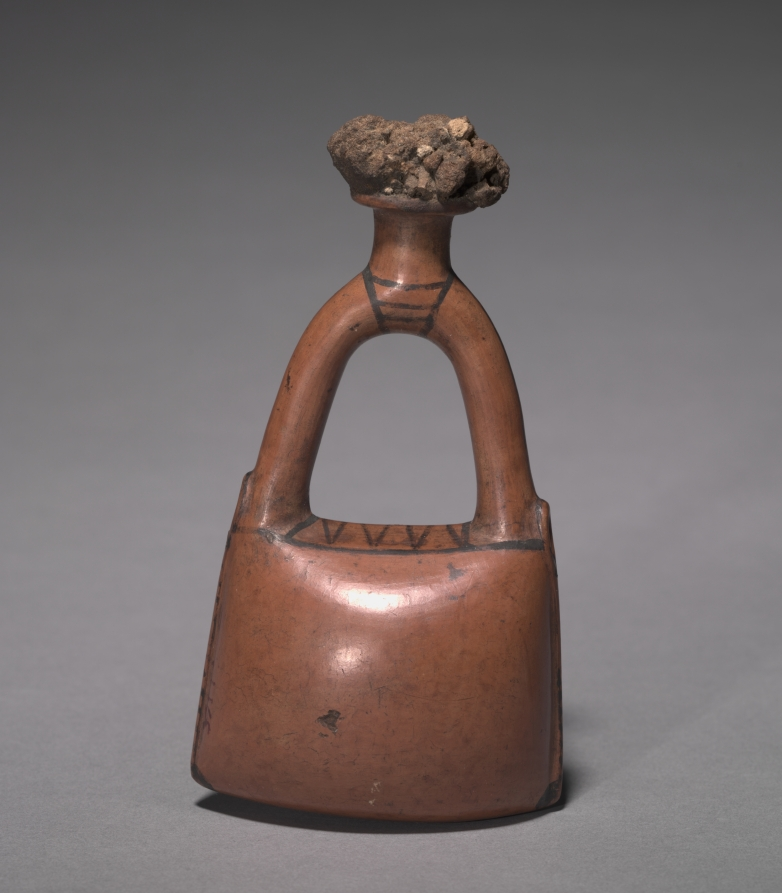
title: Flask in the Form of a Leather Bag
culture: Egypt, New Kingdom (1540–1069 BCE), Dynasty 18, reign of Tuthmosis III (1479–1425 BCE)–reign of Amenhotep III (1390–1352 BCE)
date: c. 1415–1381 BCE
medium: Nile silt ware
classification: Vessels